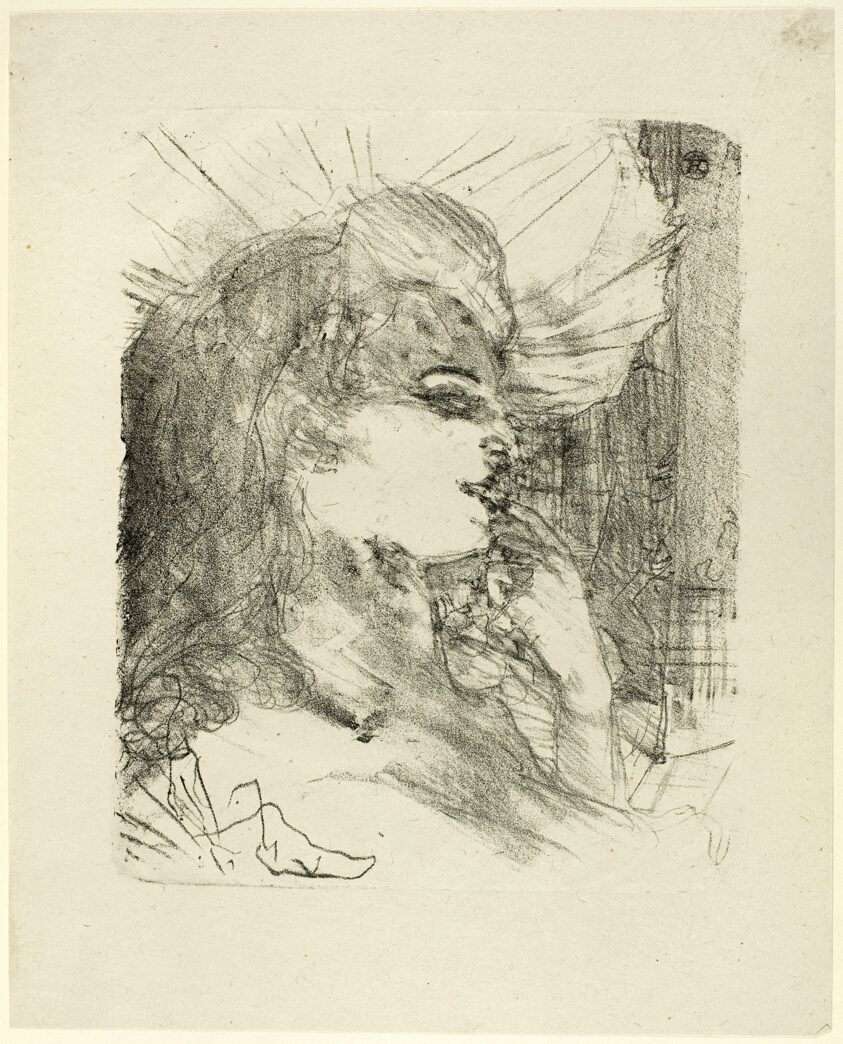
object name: Print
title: Anna Held, from Treize Lithographies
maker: Henri de Toulouse-Lautrec (French, 1864-1901)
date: 1898, published before 1906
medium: Lithograph on ivory laid paper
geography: France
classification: lithograph; print; prints and drawing